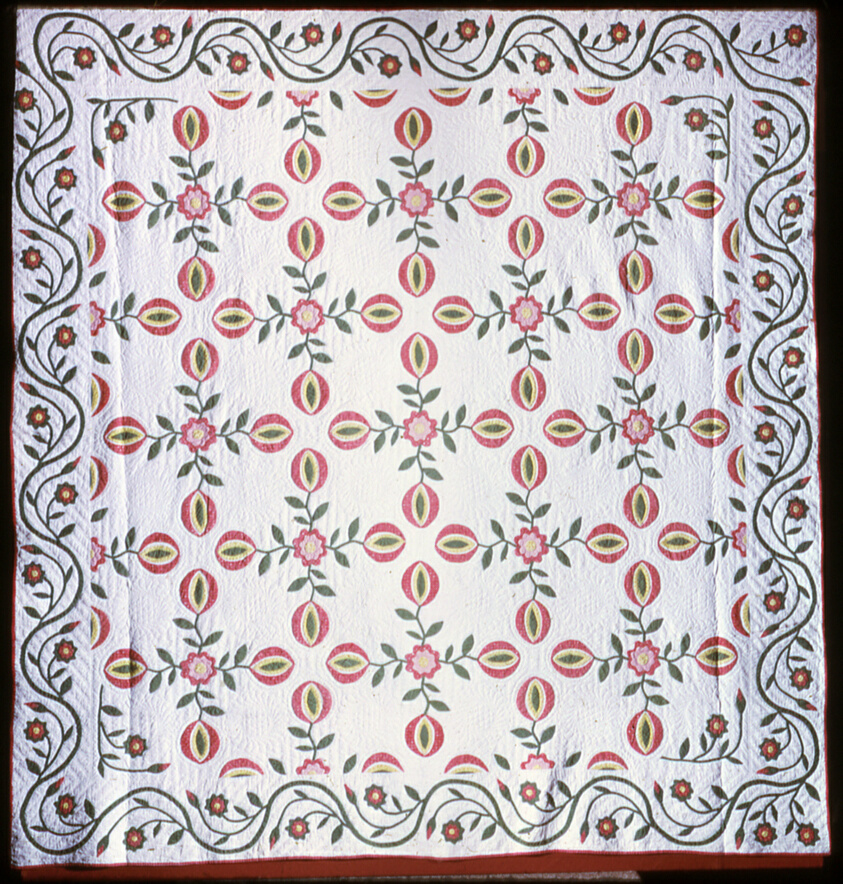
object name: Textile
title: Bedcover in "Pomegranate" Pattern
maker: United States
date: c. 1840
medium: quilted and appliqued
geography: United States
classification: textile; needlework - quilt